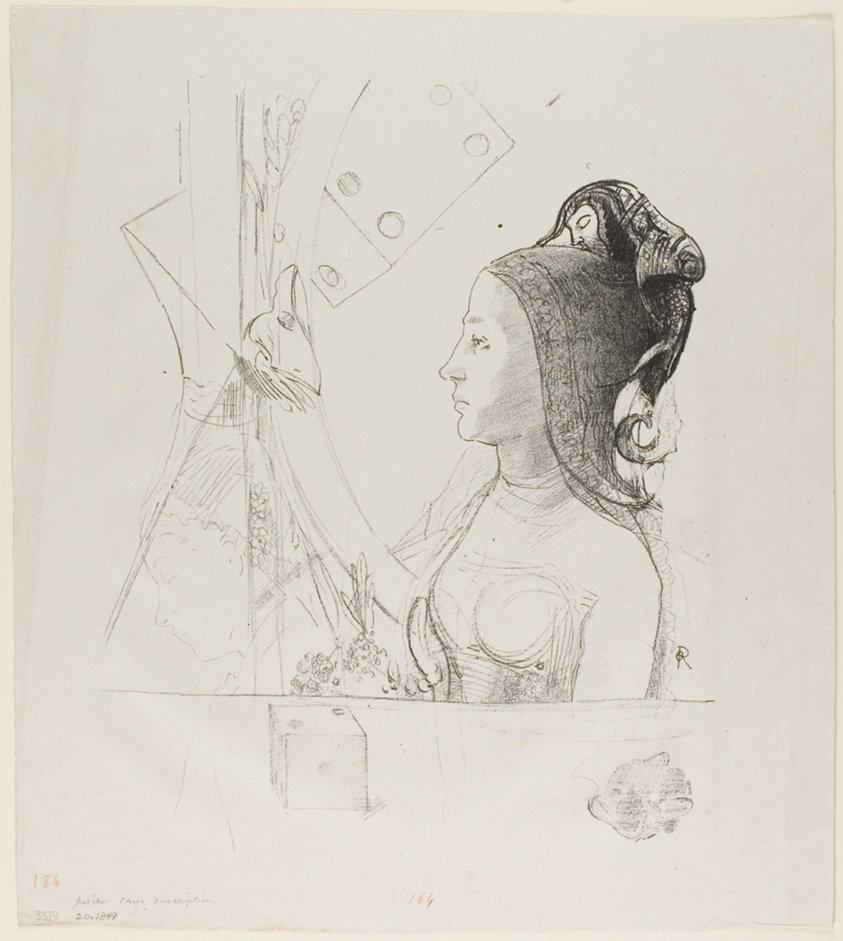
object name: Print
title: Untitled Trial Lithograph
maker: Odilon Redon (French, 1840-1916)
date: 1900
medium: Lithograph in black on light gray chine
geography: France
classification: lithograph; print; prints and drawing; paper